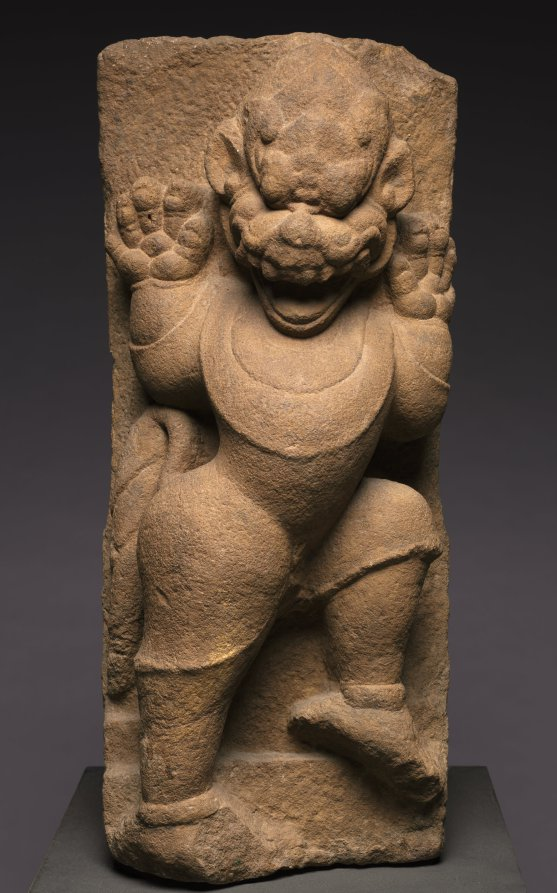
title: Heraldic Lion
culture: Vietnam (Champa)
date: 900s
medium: Beige sandstone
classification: Sculpture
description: The Cham adopted Indian Buddhist and Hindu religious systems, languages, and the practice of building stone temples and monasteries. The lion, which is ubiquitous on Indian monuments, was also incorporated as a protector at Cham sacred sites. In Champa, however, the roaring and rearing lion imagery is semihuman and distinctively aggressive and extroverted. This powerful figure rearing in a combative pose was formerly in the renowned Pan-Asian Collection of Southeast Asian art assembled during the 1960s and 1970s by one major collector, Christian Humann of the renowned Rothschild banking family.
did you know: The Champa kingdom occupied the central and south regions of present-day Vietnam. It was a powerful rival of the Khmer in Cambodia and the Viet of northern Vietnam.